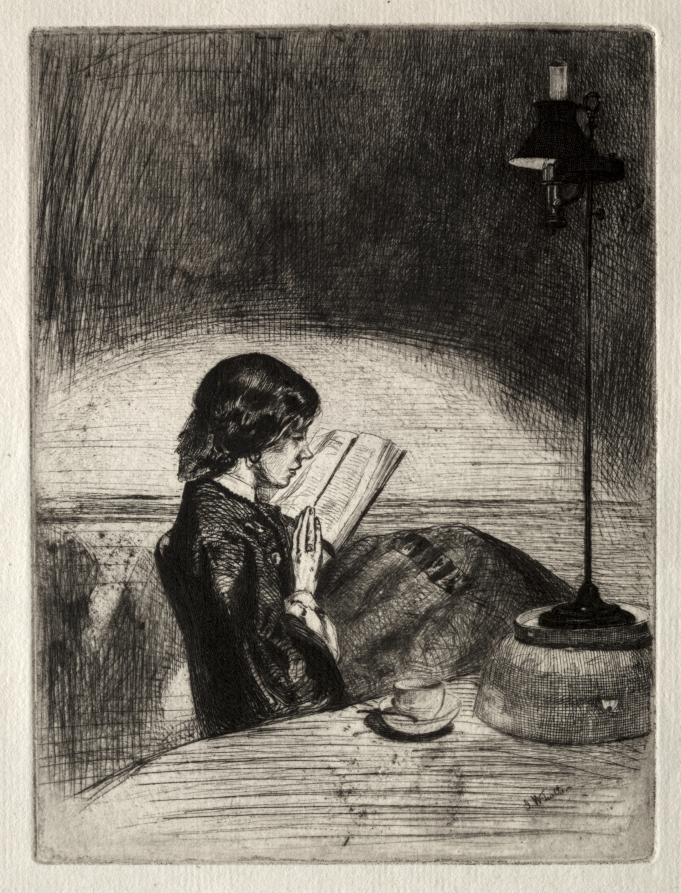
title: Reading by Lamplight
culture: America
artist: James McNeill Whistler (American, 1834–1903)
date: 1859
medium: etching and drypoint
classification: Print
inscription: signed in the plate